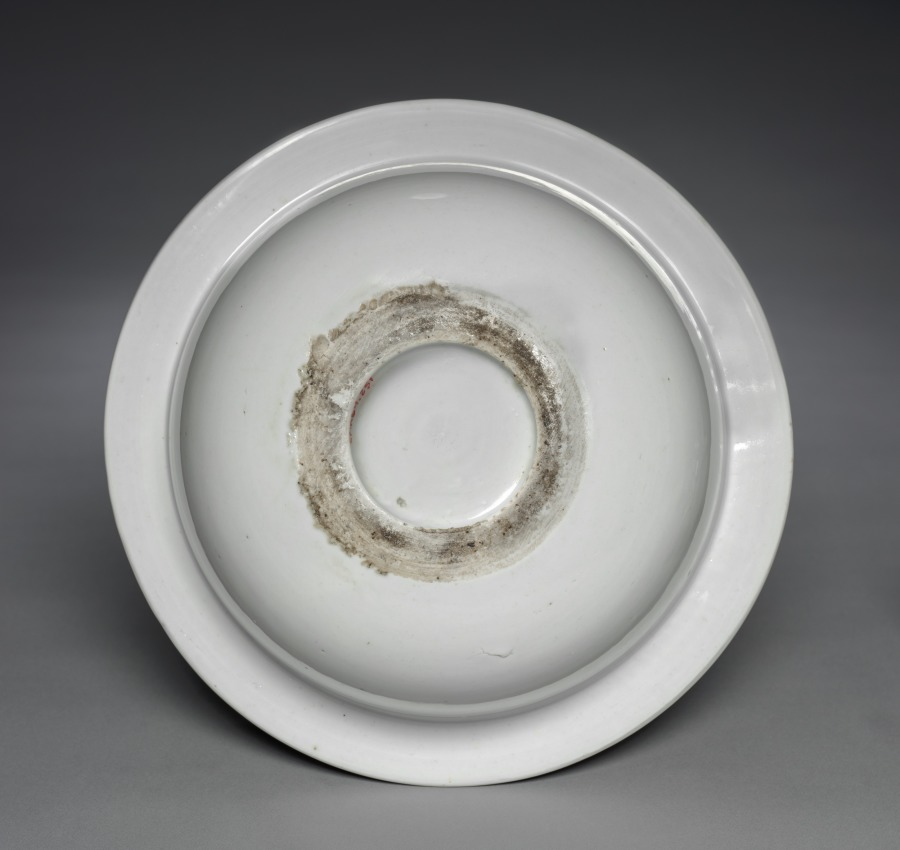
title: Rice Container: Ko Imari Type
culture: Japan, Edo period (1615–1868)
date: late 1600s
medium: porcelain with overglaze enamel and gold decoration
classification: Ceramic